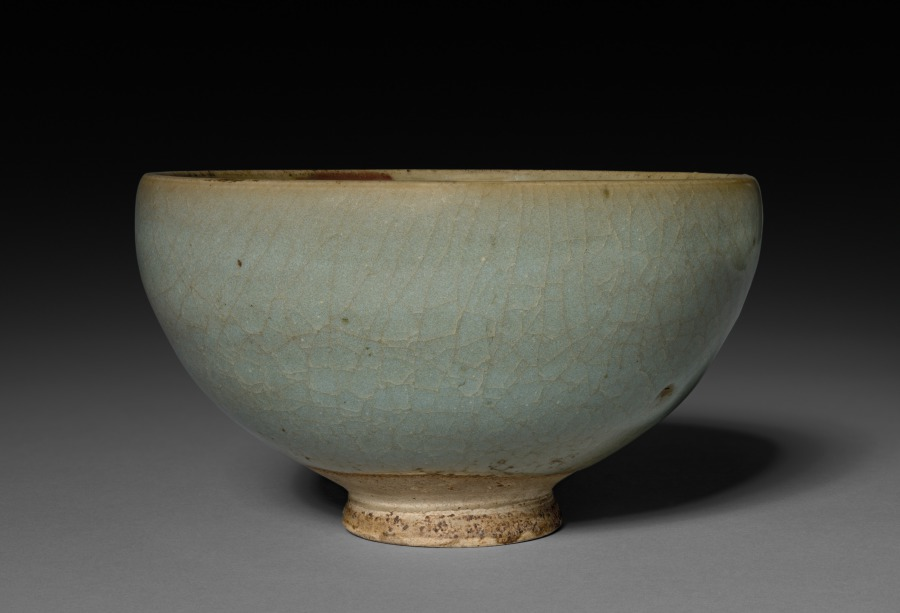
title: Bowl: Jun ware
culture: Northern China, Jin dynasty (1115-1234) - Yuan dynasty (1271-1368)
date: 13th - 14th century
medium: glazed buff stoneware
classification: Ceramic